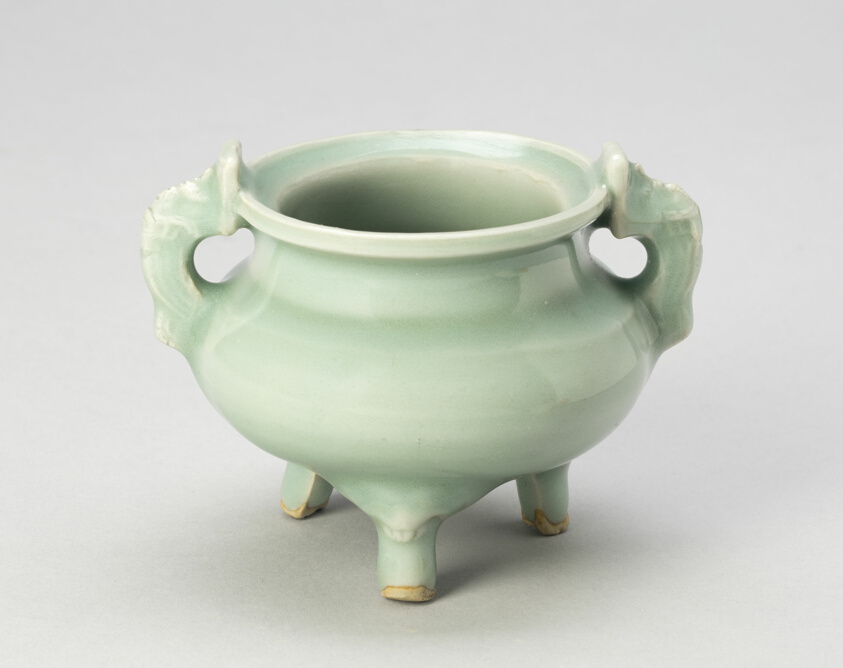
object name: Vessel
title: Tripod Incense Burner (Censer) with Monster-Head Feet and Loop Handles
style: Chinese (culture or style)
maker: China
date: Southern Song dynasty (1127–1279)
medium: Longquan ware; stoneware with underglaze molded decoration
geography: China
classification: vessel